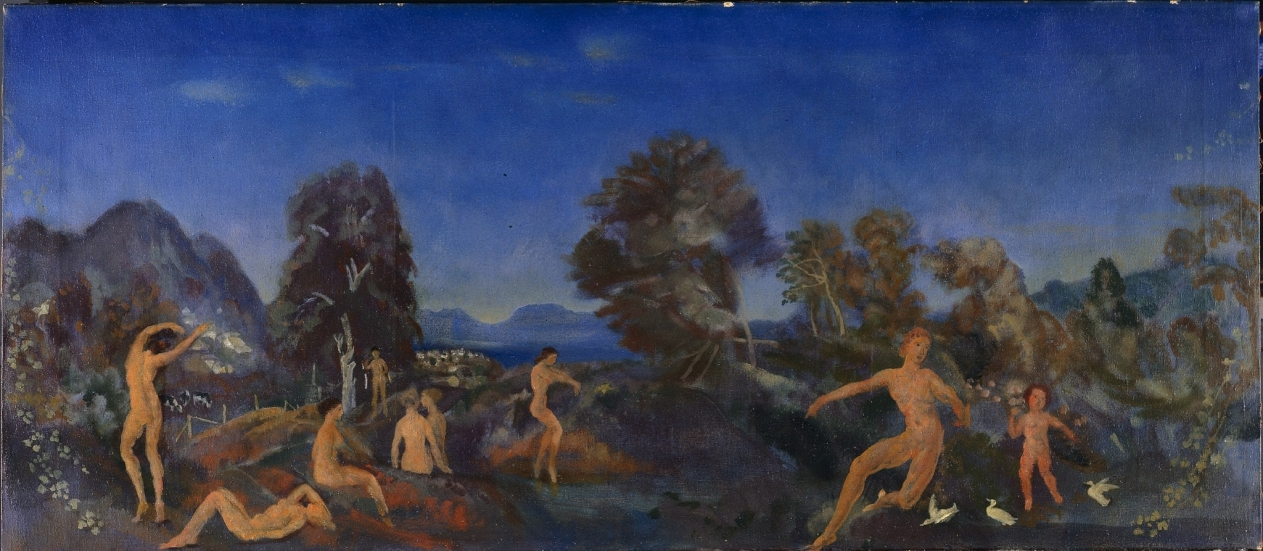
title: Hermes and the Infant Dionysus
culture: America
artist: Arthur B. Davies (American, 1862–1928)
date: 1900–1915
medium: oil on canvas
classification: Painting